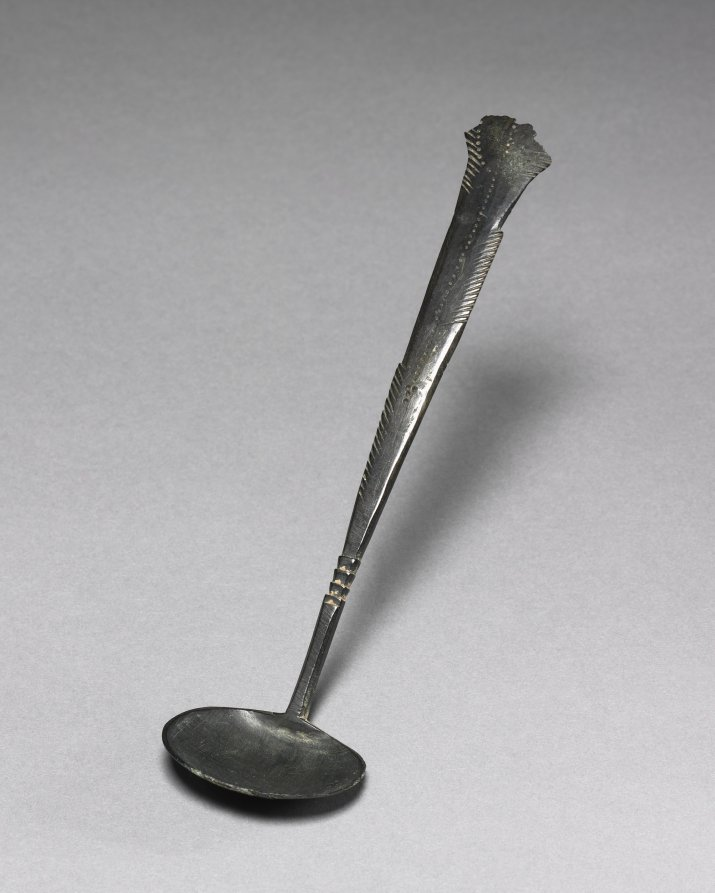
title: Spoon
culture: Korea, Goryeo dynasty (918–1392)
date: 918–1392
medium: bronze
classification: Metalwork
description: Celadons, spoons, seals, and bronze mirrors were the most common burial objects in tombs during the Goryeo period (918–1392). Furnishing tombs with an elaborate assemblage of objects was believed to honor and comfort the newly dead. Generally, Goryeo tombs were left untouched until the late 19th century. During the colonial period (1910–45), however, Japanese archaeologists hastily excavated the tombs located in Kaeseong, the former capital of the Goryeo period. Scholars recently have proposed that toward the end of the 14th century, Koreans enjoyed meat-based soups more than any other dishes, explaining why many more spoons than chopsticks were buried in tombs.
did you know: Bronze spoons are the most common burial item. This particular one is presumed to have served as a small ladle.